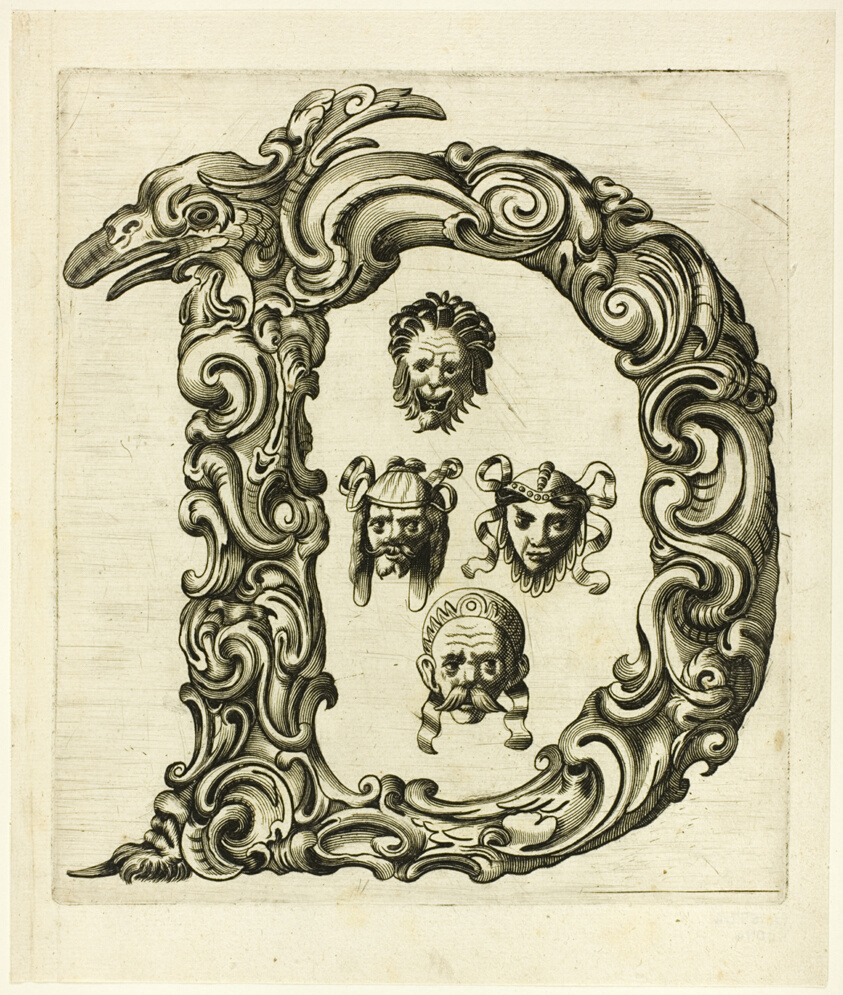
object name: Print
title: Letter D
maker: Peter Aubry (German, 1596-1668)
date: 1630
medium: Engraving on paper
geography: Germany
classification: engraving; print; prints and drawing